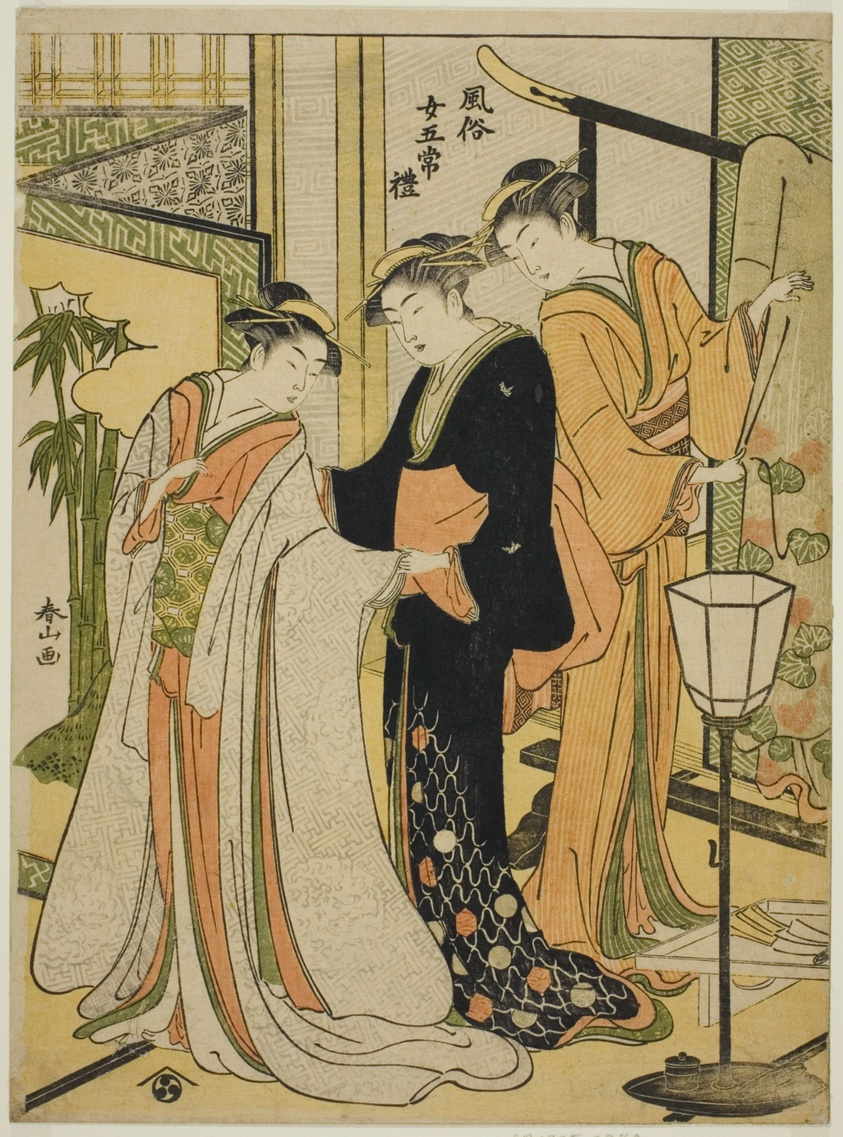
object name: Print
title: Courteousness (Rei), from the series "Five Virtues in the Manners of Women (Fuzoku onna gojo)"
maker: Katsukawa Shunzan (Japanese, active c. 1781-1801)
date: c. 1781/1801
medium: Color woodblock print; chuban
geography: Japan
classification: woodblock print; print; asian art